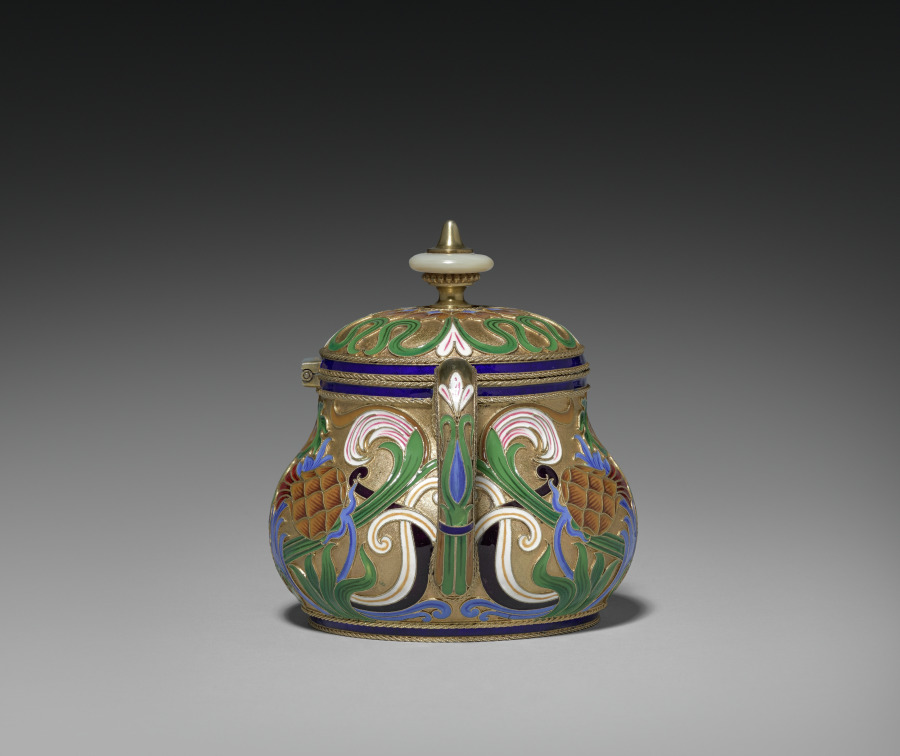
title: Covered Sugar Bowl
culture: Russia, St. Petersburg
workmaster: attributed to Feodor Ivanovich Rückert (Russian, 1840–1917)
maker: House of Fabergé (Russian, 1842–1918)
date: 1887–96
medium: silver gilt, opaque cloisonné enamel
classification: Miscellaneous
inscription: 84, St. George [assay mark for Moscow, 1882-1896]; C. Fabergé (in Cyrillic); double-headed eagle [imperial warrant]; St. George?; initials of Carl Fabergé (in Cyrillic); 10593 scratched.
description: Fabergé’s craftsmen in Moscow, especially under the watchful eye of workmaster Feodor Rückert, became known for their work in the pan-Slavic or neo-Russian style, hearkening back to 17th-century motifs of Russian folk art. Often on rather conventional shapes, Rückert and his silversmiths created an explosion of color, achieved through the historic technique of cloisonné enamel in which tiny metal lines are soldered to the surface then filled with glass powders in various colors and fired to create a high gloss finish. The result is a spectacular evocation of the 17th-century originals. Far from mere copies, however, Rückert's designs, such as this tea service, employ naturalistic or abstract motifs in a thoroughly modern adaptation of a remarkable earlier period of Russian art and decoration.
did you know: This covered sugar bowl is part of a larger tea service.